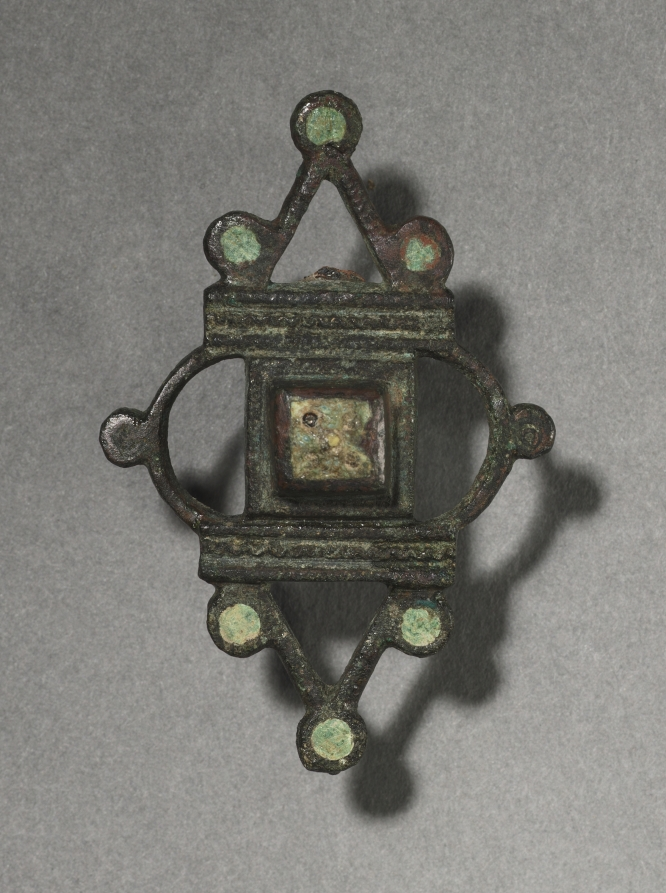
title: Ornamental Brooch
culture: Gallo-Roman or Romano-British, Migration period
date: c. 100–300 CE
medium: bronze and champlevé enamel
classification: Jewelry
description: These brooches functioned as garment clasps (much like the generally larger fibulae) and are distinctive for their decorative enamels. The art of enameling was highly popular among the conquered peoples who lived on the outskirts of the Roman empire, chiefly the Celts and the Gauls. Though the enameling technique was practiced by the Romans themselves on small objects, the brightly colored decoration readily appealed to "barbarian" taste. By the AD 200s, enameled brooches like these were being made in abundance by the native peoples of Britain and Gaul (modern France and Belgium).